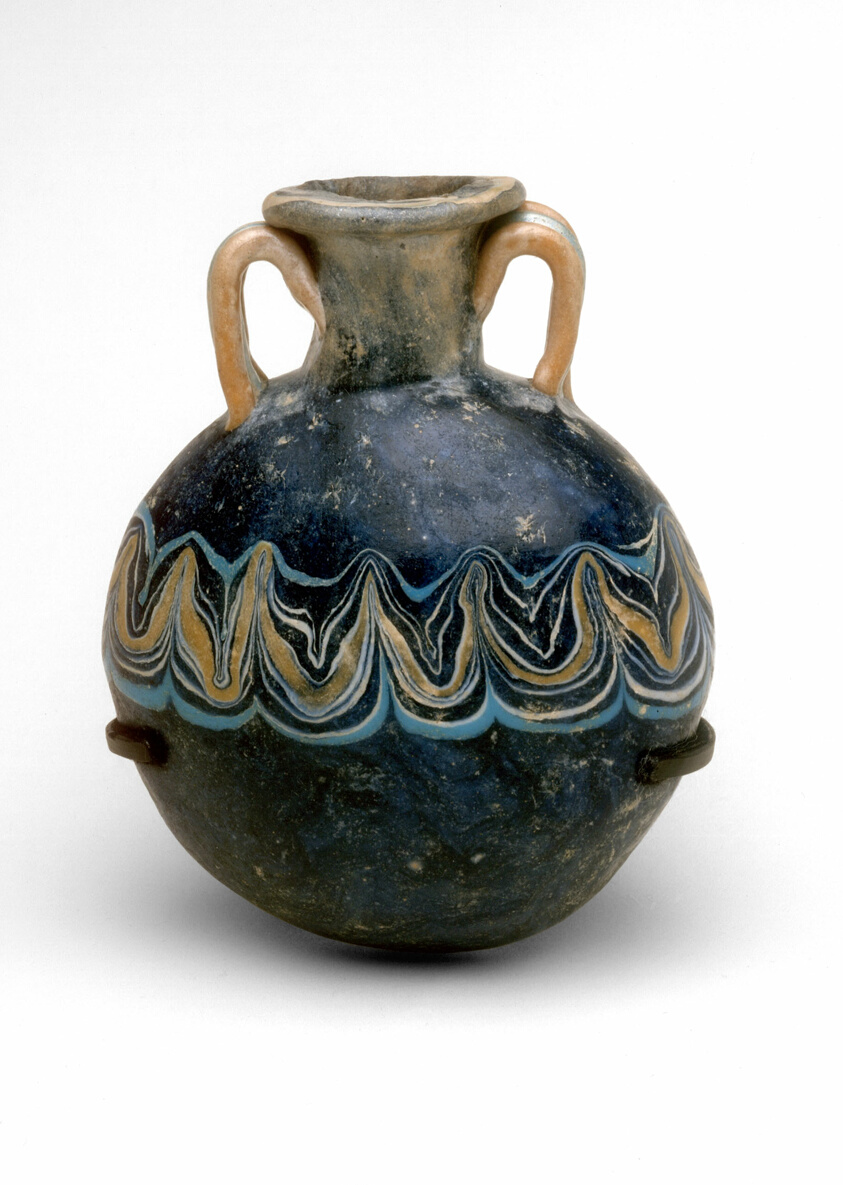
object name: Vessel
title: Bottle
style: eighteenth dynasty, new kingdom, nineteenth dynasty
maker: Egyptian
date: New Kingdom, late Dynasty 18 or 19, (about 1505–1202 BCE)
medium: Glass, core-formed technique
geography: Egypt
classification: bottle; glass; vessel; ancient art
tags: bottles